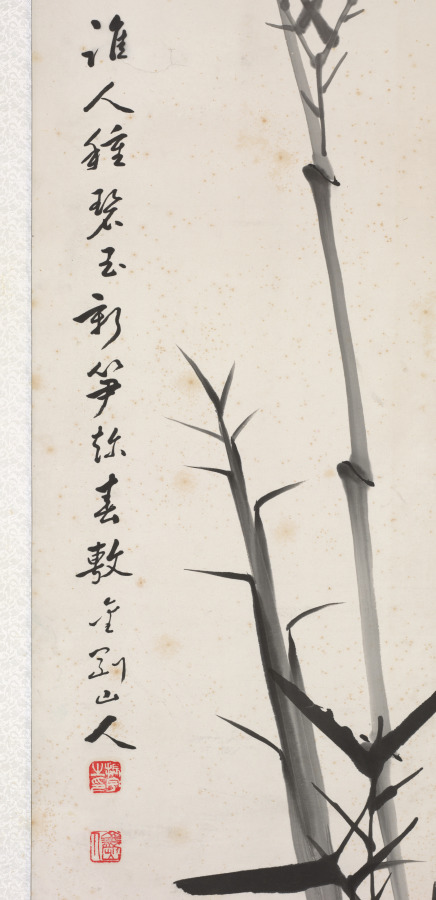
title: Bamboos in Wind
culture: Korea, Japanese colonial period (1910−1945)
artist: Kim Jin-woo (Korean, 1883–1950)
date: 1934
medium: Ten-panel folding screen; ink on paper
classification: Painting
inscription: Two chops stamped on each panel: 振宇之印 (Jinwoo’s Seal); 金剛山人 (Diamond Mountain Man)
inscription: Inscription written on the far-left panel: 甲戌流??寫於竹林堂金剛山人振宇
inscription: Inscription written on the 8th panel: 五百間淸風金剛山人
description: Active during the Japanese colonial period in Korea (1910–45), the artist Jin-woo Kim earned his artistic reputation for his expressive renditions of bamboo swaying in a strong wind. His piercing bamboo shoots are often compared to an iron spear, and their sharp leaves to a knife. It is believed that he deliberately emphasized sharpness in his brushstrokes to express his strong resistance against Japanese colonial oppression.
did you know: The artist’s prolific artistic production were a major part of fundraising efforts to support resistance activities for Korea’s independence.